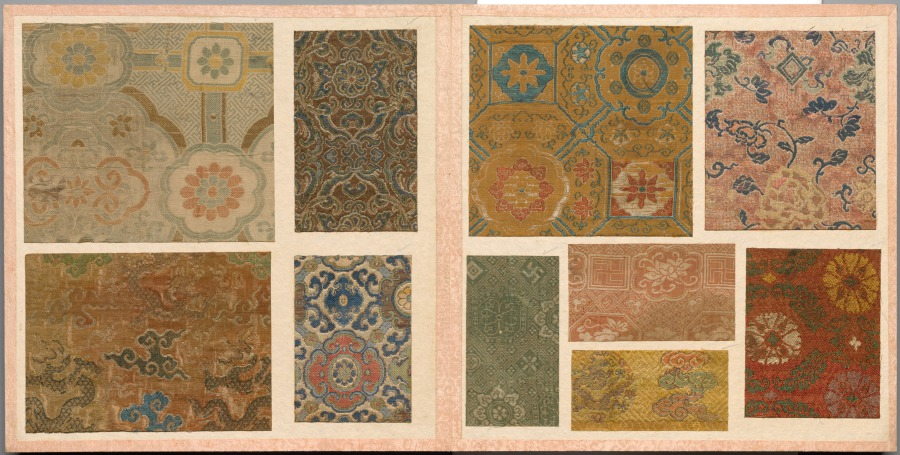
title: Album of Textile Samples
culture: Japan and China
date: 1700s–1800s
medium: silk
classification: Textile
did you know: This album contains 46 pages with 156 mounted Chinese or Japanese textile samples.